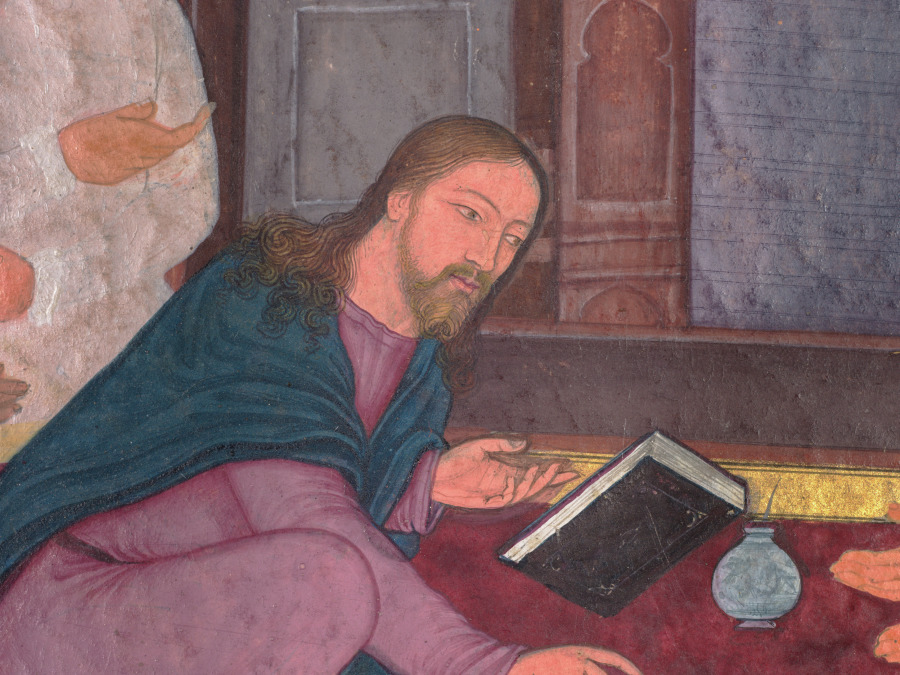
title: Jesus writes on the ground (folio 130 verso), from a Mirror of Holiness (Mir’at al-quds) of Father Jerome Xavier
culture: Mughal India, Allahabad, made for Prince Salim (1569–1627)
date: 1602–4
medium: Gum tempera, ink, color, and gold on paper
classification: Manuscript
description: As Jesus was debating with the scribes and Pharisees in Jerusalem, they brought before him an adulterous woman. Hoping to incite him to violence, they declared that if Jesus followed the law of Moses, he should order her to be stoned to death. Jesus responded, “Let whichever of you is without sin cast the first stone.” Then he began to write with his finger on the ground, and each of the men saw a description of his own sins. The two men in the bottom corner of the painting clutch stones with expressions of doubt, fear, and disgust. The adulteress in the red dress holds out her hands in supplication.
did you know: The adulteress wears a red dress, gold rings, and a necklace under her stole.